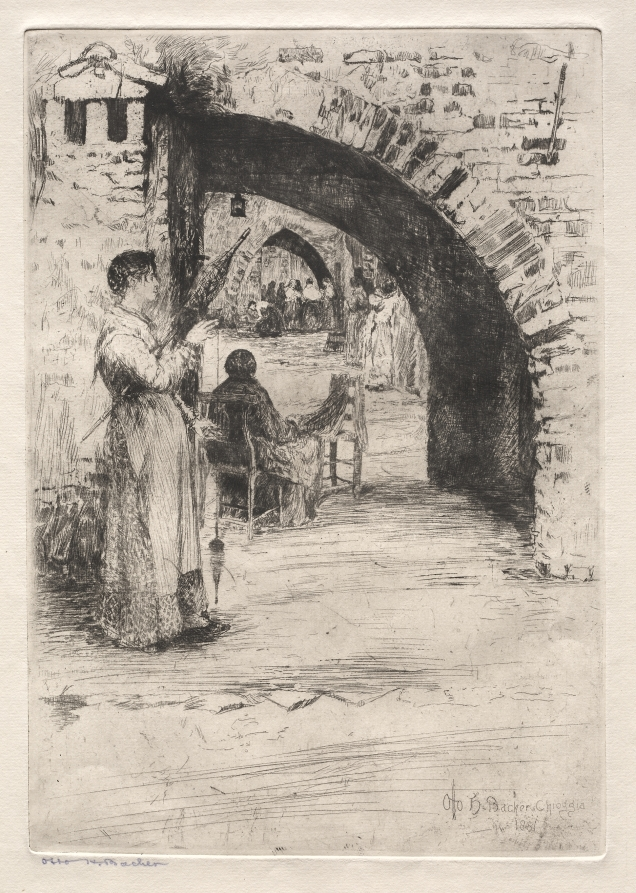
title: Etchings of Venice: Net Makers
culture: America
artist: Otto H. Bacher (American, 1856–1909)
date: 1881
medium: etching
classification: Print